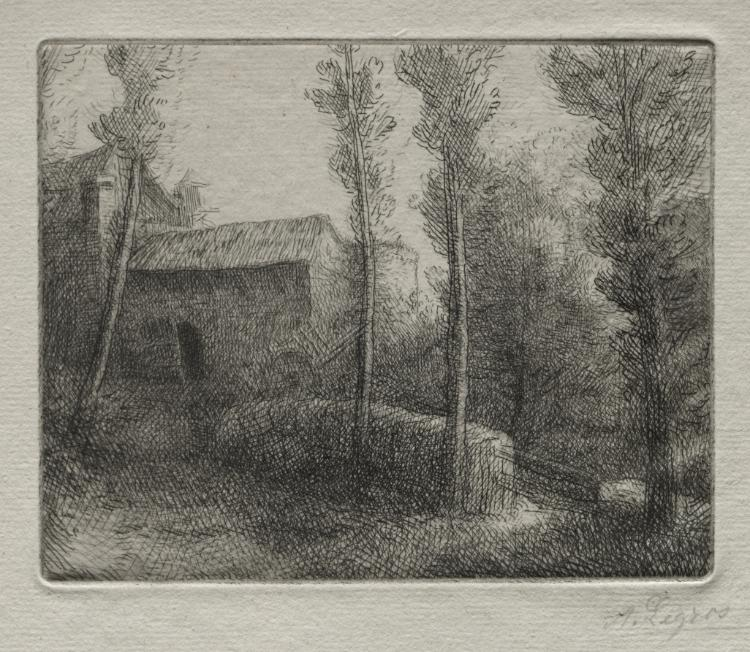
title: Le Pont du Moulin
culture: France, 19th century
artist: Alphonse Legros (French, 1837–1911)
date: c. 1857–1911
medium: drypoint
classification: Print